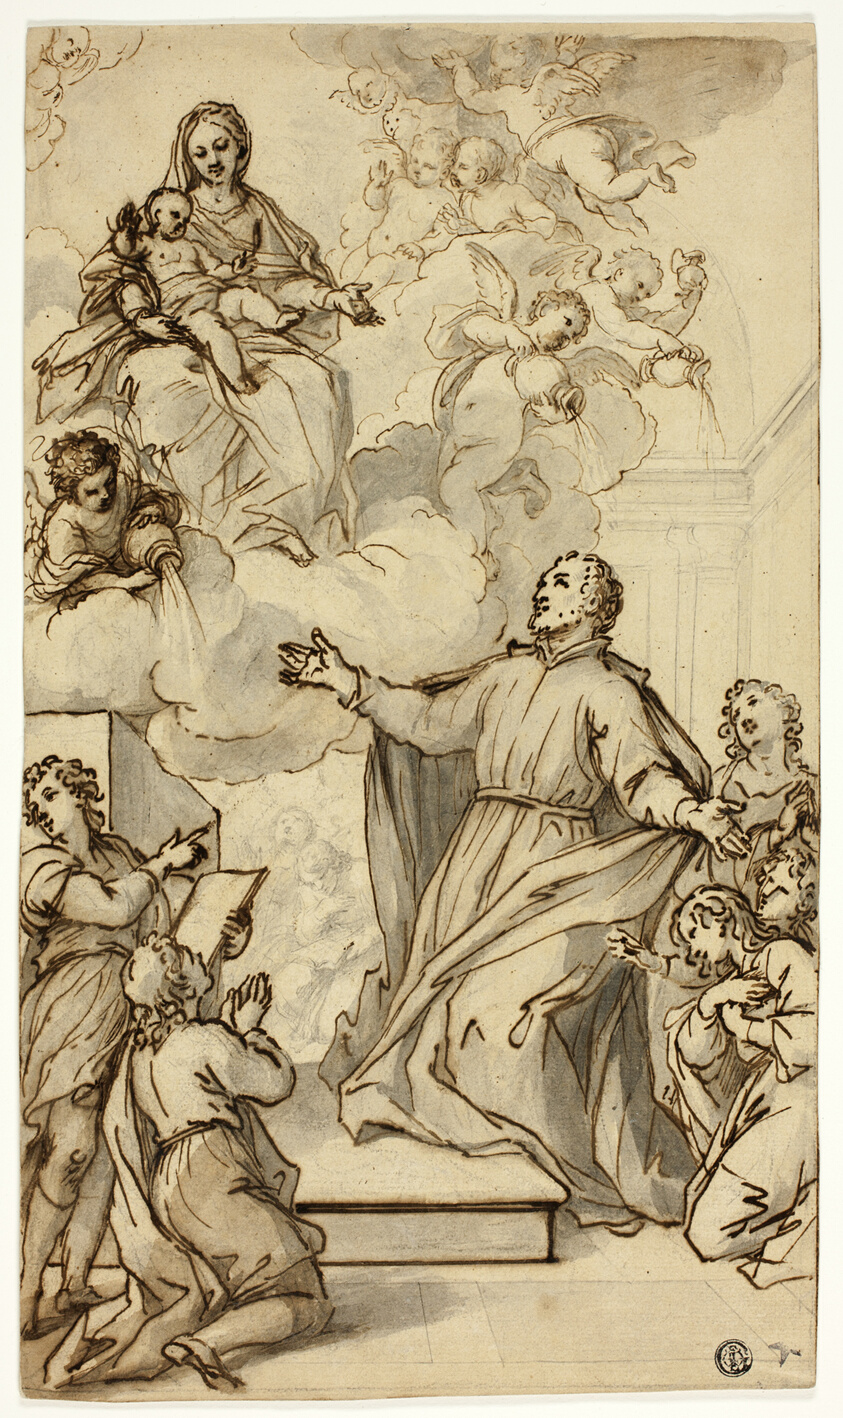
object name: Drawing and Watercolor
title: Vision of Philip Neri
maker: Attributed to Anthonie van Dyck (Flemish, 1599-1641); or a follower of Carlo Maratti (Italian, 1625-1713)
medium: Pen and brown ink with brush and gray wash, over black chalk, on cream laid paper, laid down on card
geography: Flanders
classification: pen and ink drawings; drawings (visual works); prints and drawing